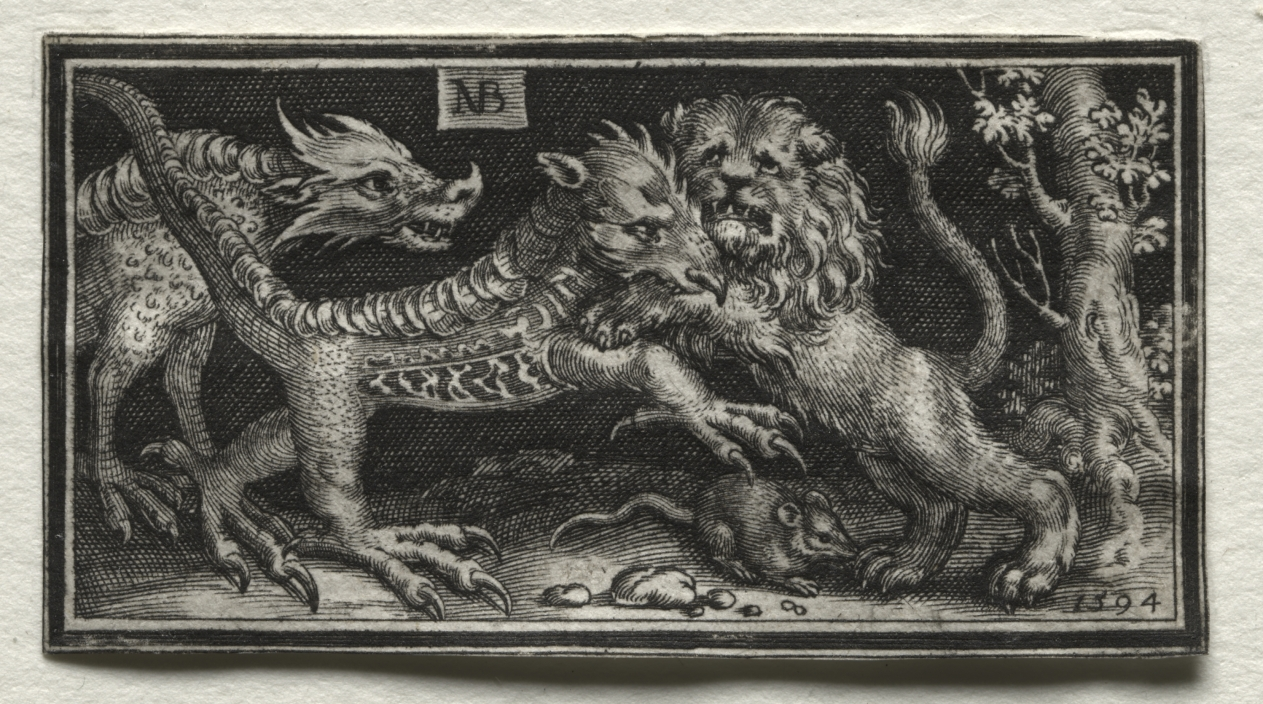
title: Lion Fighting two Beasts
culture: Netherlands, 16th century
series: Fighting Chimeras and Scenes to Aesop's Fables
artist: Nicolaes de Bruyn (Netherlandish, 1571–1656)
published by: A. van Londerseel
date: 1594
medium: engraving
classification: Print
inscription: upper center, in plate: NB[in monogram] ; lower right, in plate: 1594 ; VERSO, lower left, in graphite: B 4241 ; lower center, in graphite: 9[circled] FPO ; lower right, in graphite: 6242/130